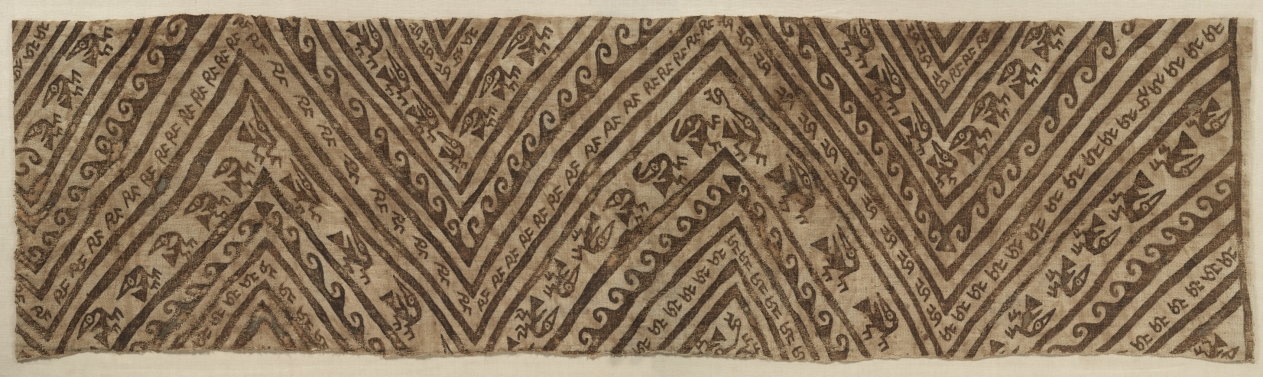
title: Painted Wrapping for Mummy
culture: Peru, Central Coast, Chancay, 12th-15th century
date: c.1100–1400 A.D.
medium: plain cloth, painted; cotton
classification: Textile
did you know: Fine textiles were one of the most prestigious commodities in the ancient Andes.